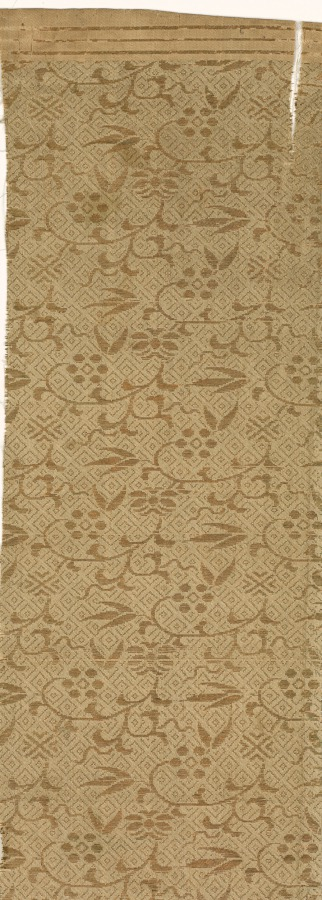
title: Fragment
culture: China, 19th century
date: 1800s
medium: silk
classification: Textile